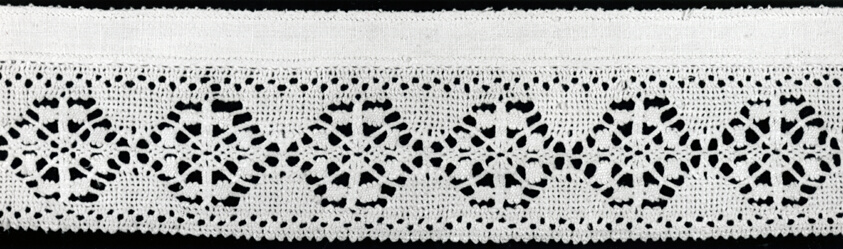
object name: Textile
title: Insertion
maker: Italy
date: Late 17th/early 18th century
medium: Linen, bobbin straight lace; foundation of linen, plain weave; embroidered in hem stitch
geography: Italy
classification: textile; lace - bobbin